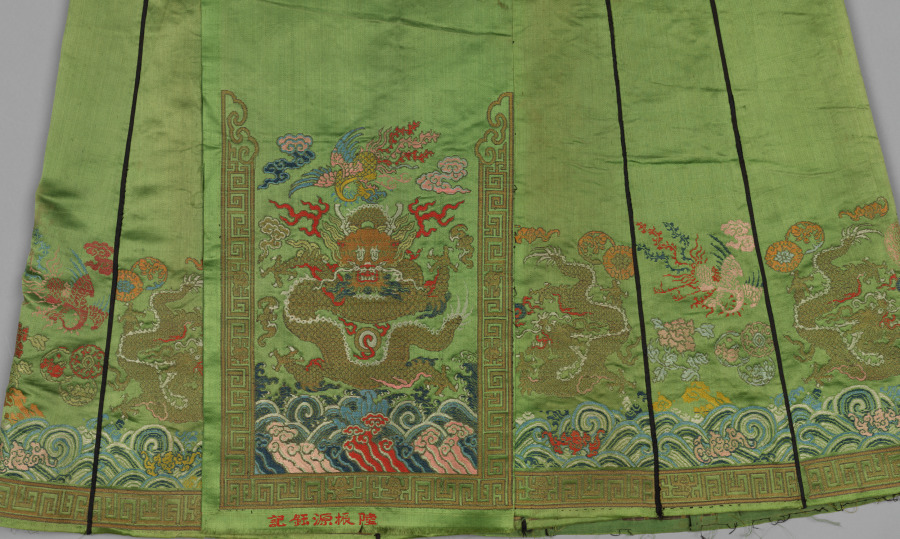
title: Skirt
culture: China, Qing dynasty (1644-1911)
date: late 1800s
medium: Silk and gold thread: embroidery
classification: Garment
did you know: This is a bridal skirt that would be worn with a coat like CMA 1916.1355.